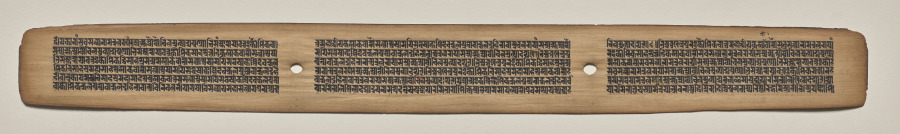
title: Text, folio 46 (recto), from a Manuscript of the Perfection of Wisdom in Eight Thousand Lines (Ashtasahasrika Prajnaparamita-sutra)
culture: Eastern India, Bihar, Vikramashila Monastery. Painting: Nepal, Kathmandu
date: Sunday, September 14, 1119 (year 239 of the Newar Samvat in the month of Ashvina)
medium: gum tempera and ink on palm leaves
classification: Painting